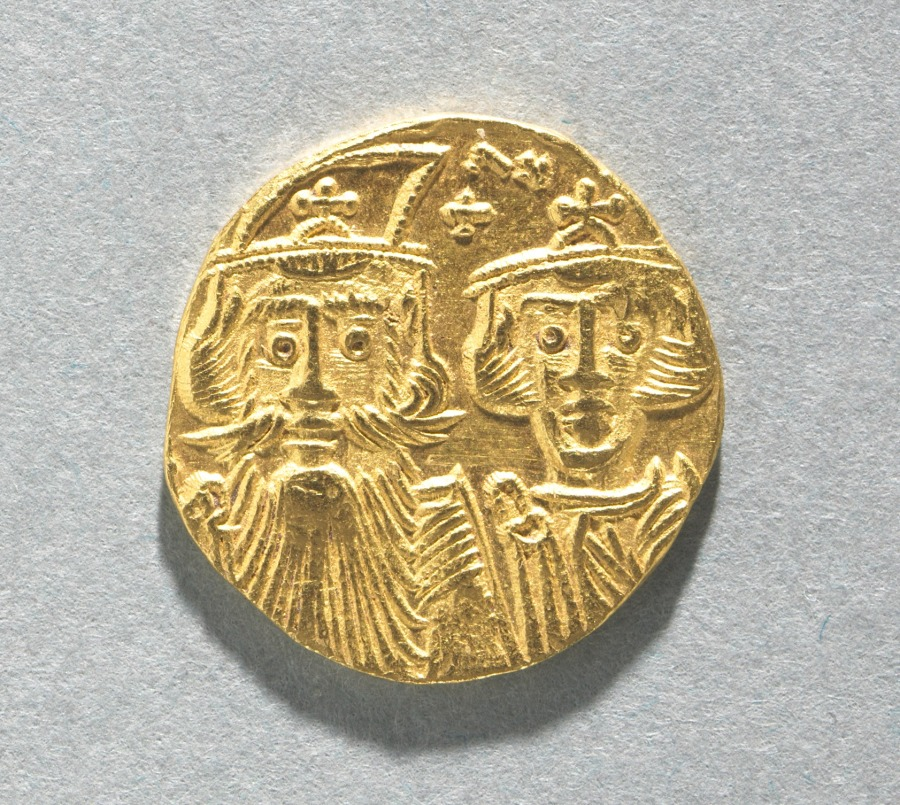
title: Solidus of Constans II and Constantine IV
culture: Byzantium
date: 659–661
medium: gold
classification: Coins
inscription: VICTORIA AVGU and officina letter (cut off and incomplete)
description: The vast number of surviving Byzantine coins attests to the level of trade across the empire. Controlled and supervised by the emperor, the producers of coins took care to represent his authority and reflect his stature. Talented artists were recruited to engrave the dies (molds) used for the striking of coins. Emperors increasingly came to include their heirs and co-emperors on their coinage, as well as other family members or even earlier rulers. Coins were recognized, then as now, as small, portable works of art. With their inscriptions and images, Byzantine coins provide valuable documentation of historical events and a record of the physical appearance of the emperors. The coin shown here is the solidus, the basic gold coin of 24 karats.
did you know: The emperor depicted on the left was also known as "Constantine the Bearded."